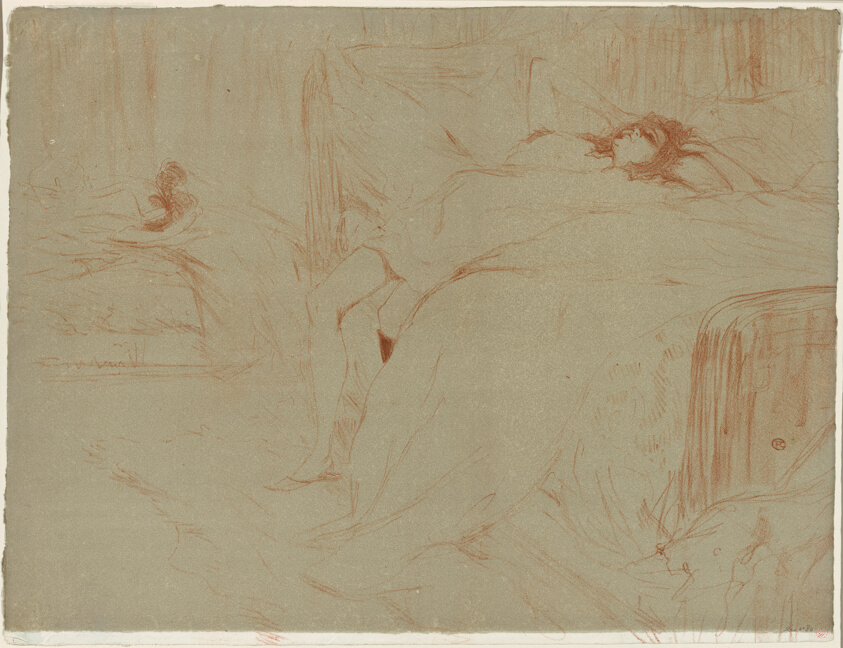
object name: Print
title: Woman Lying on her Back, Lassitude, plate ten from Elles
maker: Henri de Toulouse-Lautrec (French, 1864-1901); published by Gustave Pellet (French, 1859-1919); probably printed by Auguste Clot (French, 1858-1936)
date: 1896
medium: Color lithograph on ivory wove paper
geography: France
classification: lithograph; print; prints and drawing